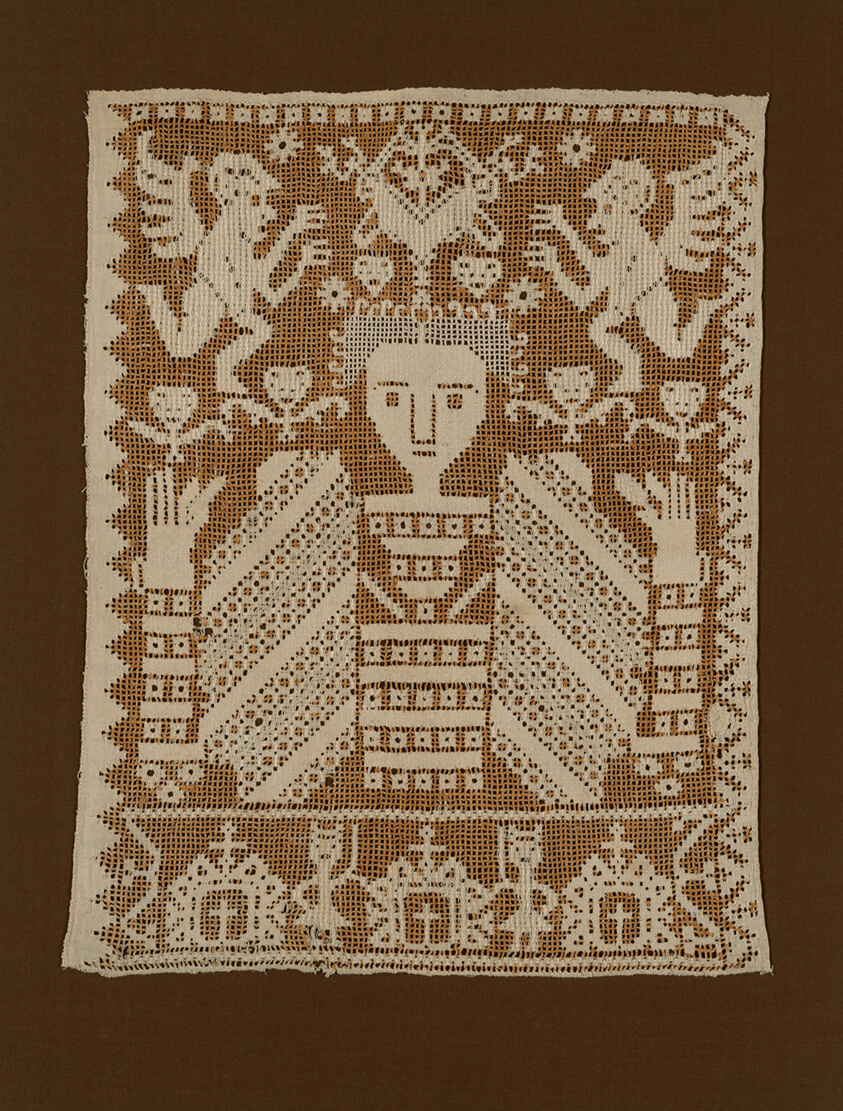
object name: Textile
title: Panel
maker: Italy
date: 1601/25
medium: Linen, plain weave; drawn work embroidered in darning, hem, overcast, and Russian overcast stitches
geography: Italy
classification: textile; needlework (visual works)